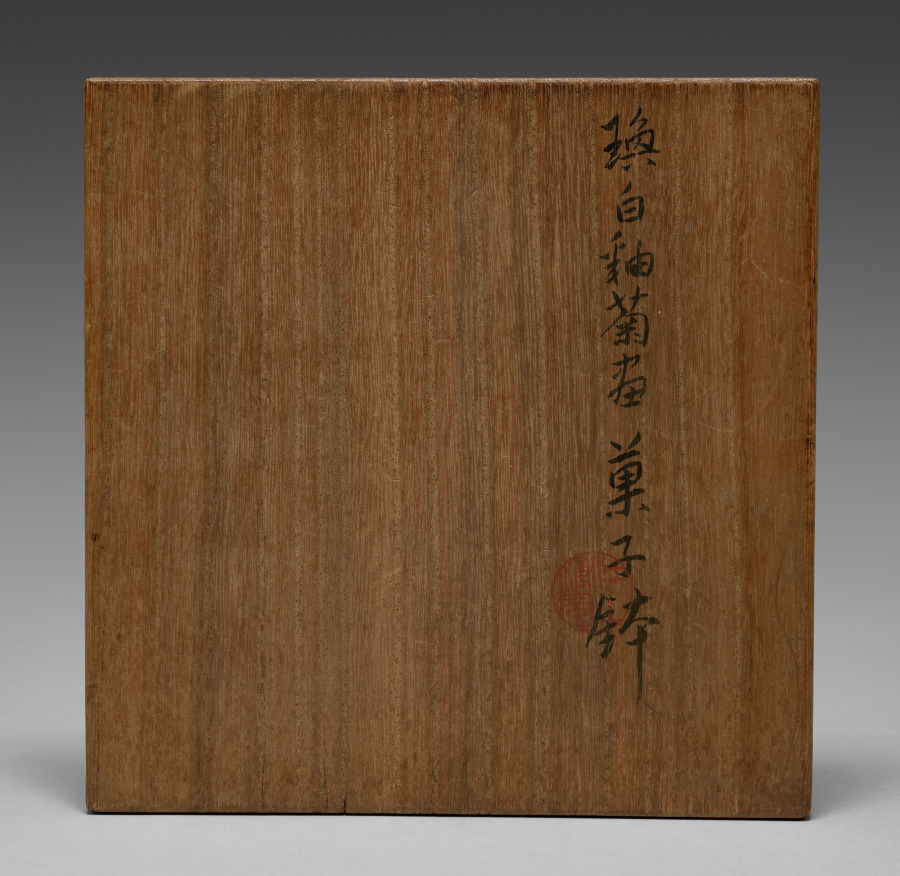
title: Sweets Bowl with Chrysanthemums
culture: Japan, Taishō period (1912–26) or Shōwa period (1926–89)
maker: Seifū Yohei IV (Japanese, 1872–1951)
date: 1914–46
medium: Porcelain with molded and carved design, underglaze color, and cream glaze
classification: Ceramic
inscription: 清風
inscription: 成山清風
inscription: 清風造 【印】 清風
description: Sweets bowls hold the confections enjoyed when drinking tea. This bowl and CMA 2022.206 offer an important lesson in appreciating Yohei IV’s ceramic practice. While they have the same design and shape and are made with the same materials, the execution of the pieces makes them entirely different after close inspection, thereby demonstrating the range of possible production results from a single template. Each bowl has the same composition of two different types of chrysanthemum flowers, one with long, slim, knifelike petals and the other with short, rounded, multilayered petals, shown running around its surface in low relief. The centers of the flowers are painted with yellow under the glaze. Yohei III formulated a number of new underglaze colors during his career, and this is likely one of them. For both bowls here, Yohei IV used his father’s kanpakuji formula, with underglaze pink for the gradated wash of color surrounding the flowers. The storage box lid provides abbreviated descriptions of the complex processes used in the surface decorations. It identifies the bowl as “Sweets dish with carved picture of chrysanthemum in kanpakuji.” The box has Yohei IV’s signature on the lid’s exterior, along with a seal reading “Seizan Seifu” 成山清風. The ink inscriptions are done in an elegant semiformal calligraphy. This bowl is more subtle and smooth in both the effect of the glaze and the execution of the relief. The designs are centered on the body between rim and foot. A closer look at the delineation of the flower petals reveals that the designs differ at times with respect to which petals appear in front or behind others. The centers of the bases of both bowls are incised with “Seifu” in a manner matching many other works by Yohei IV, although there are slight differences. As one might expect from the other differences in the bowls, the characters on the base of this subtle bowl are gentler, finishing in a tapering out of the strokes. Those on the bold bowl, CMA 2022.206, end in triangular pinheads.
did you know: This ivory and pink bowl by Seifū Yohei IV show his father’s “bright-jewel white porcelain” technique.